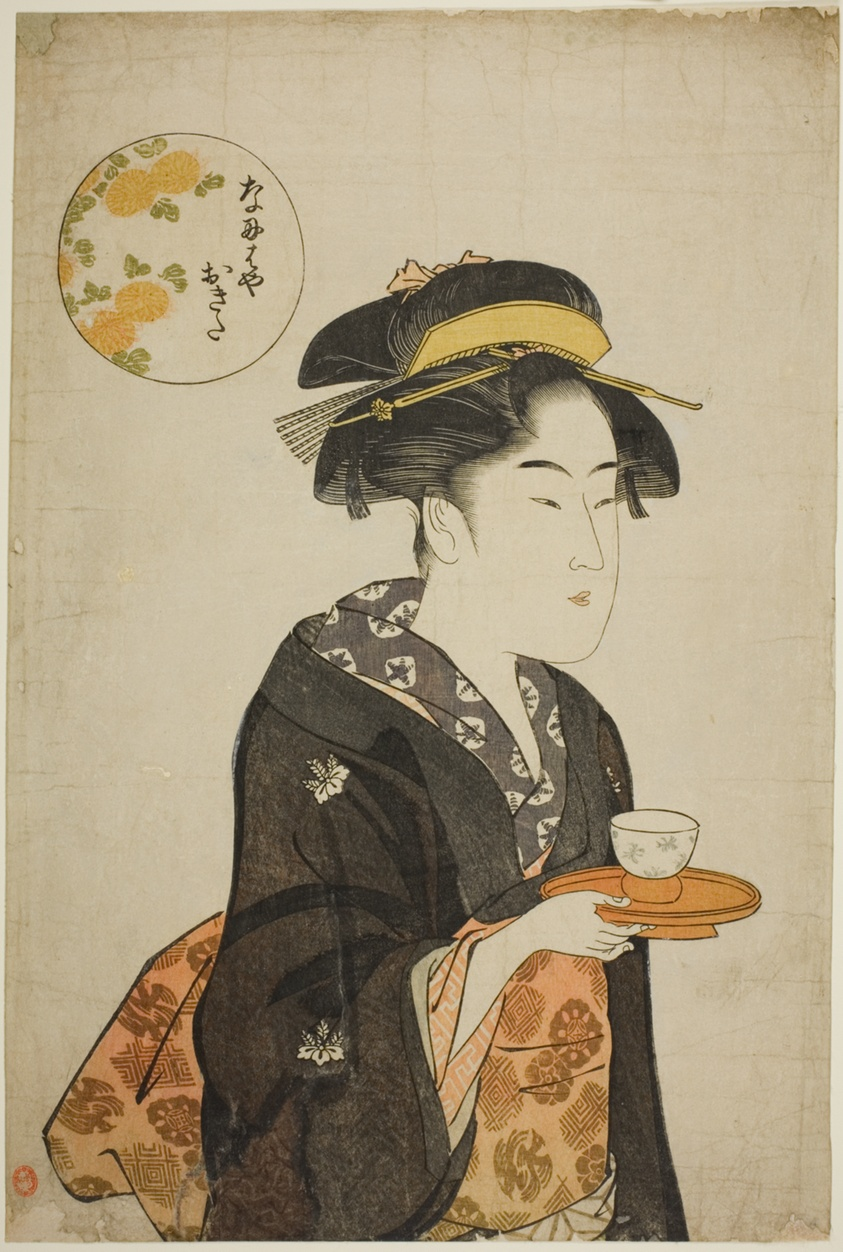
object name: Print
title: The Waitress Okita of the Naniwaya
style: Japanese (culture or style)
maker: Katsukawa Shuncho; Japanese, active c. 1780-1801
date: c. 1792/93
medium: Color woodblock print; oban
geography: Japan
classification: woodblock print; print; asian art